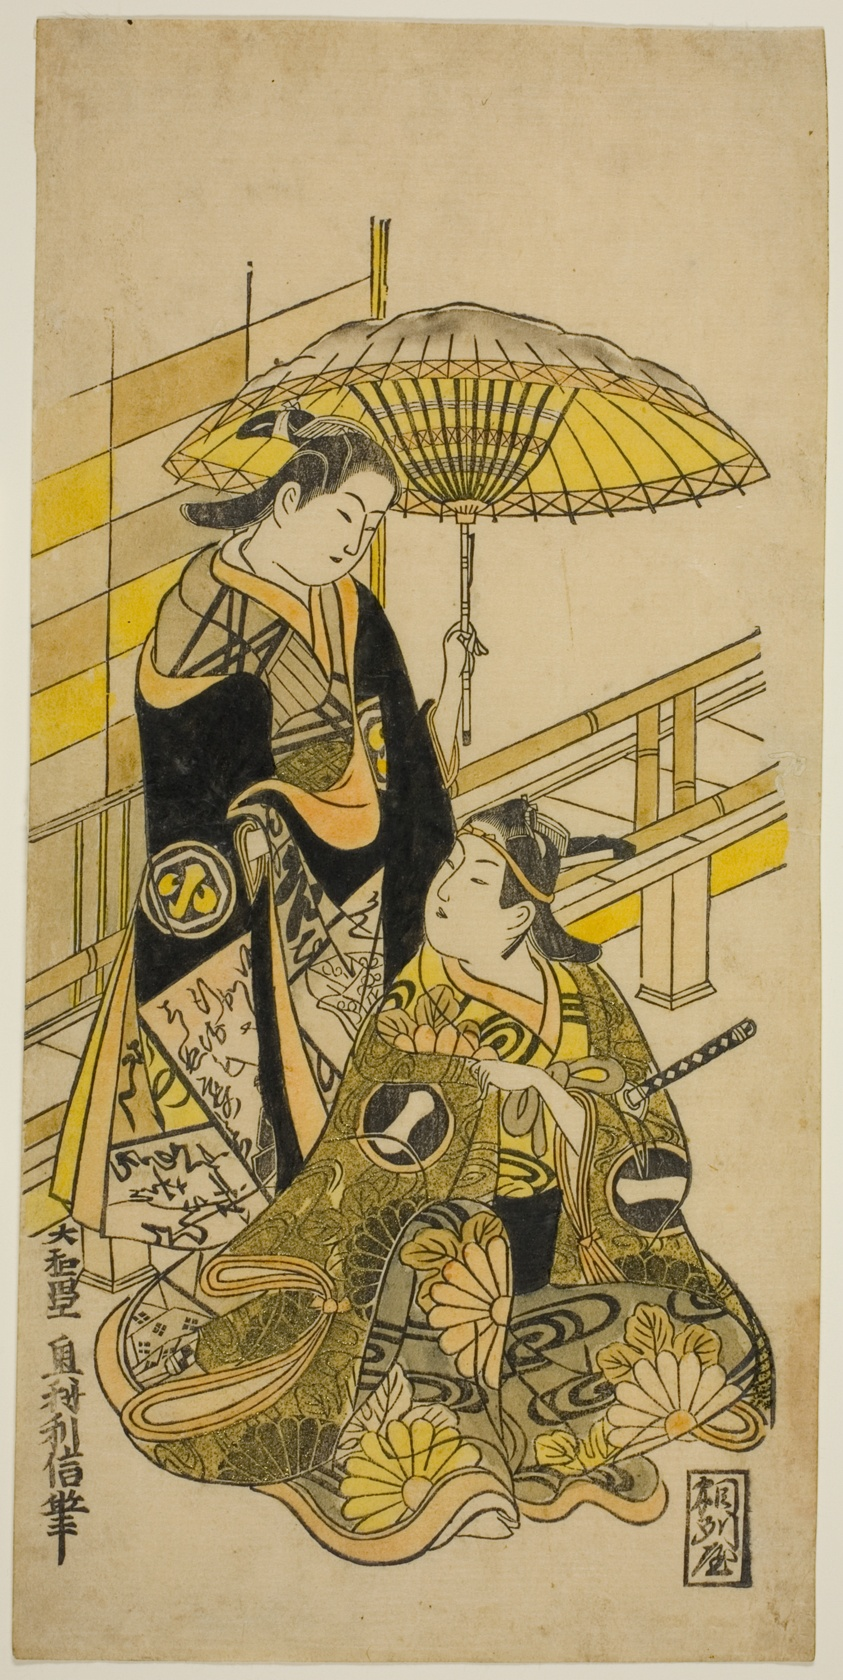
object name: Print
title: The Actors Ichikawa Monnosuke I as Kusunoki Masatsura and Arashi Wakano as Oyuki in the play "Honen Taiheiki," performed at the Nakamura Theater in the eleventh month, 1723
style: Japanese (culture or style)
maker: Okumura Toshinobu (Japanese, active c. 1717-50)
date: 1723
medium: Hand-colored woodblock print; hosoban, urushi-e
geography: Japan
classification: woodblock print; print; asian art